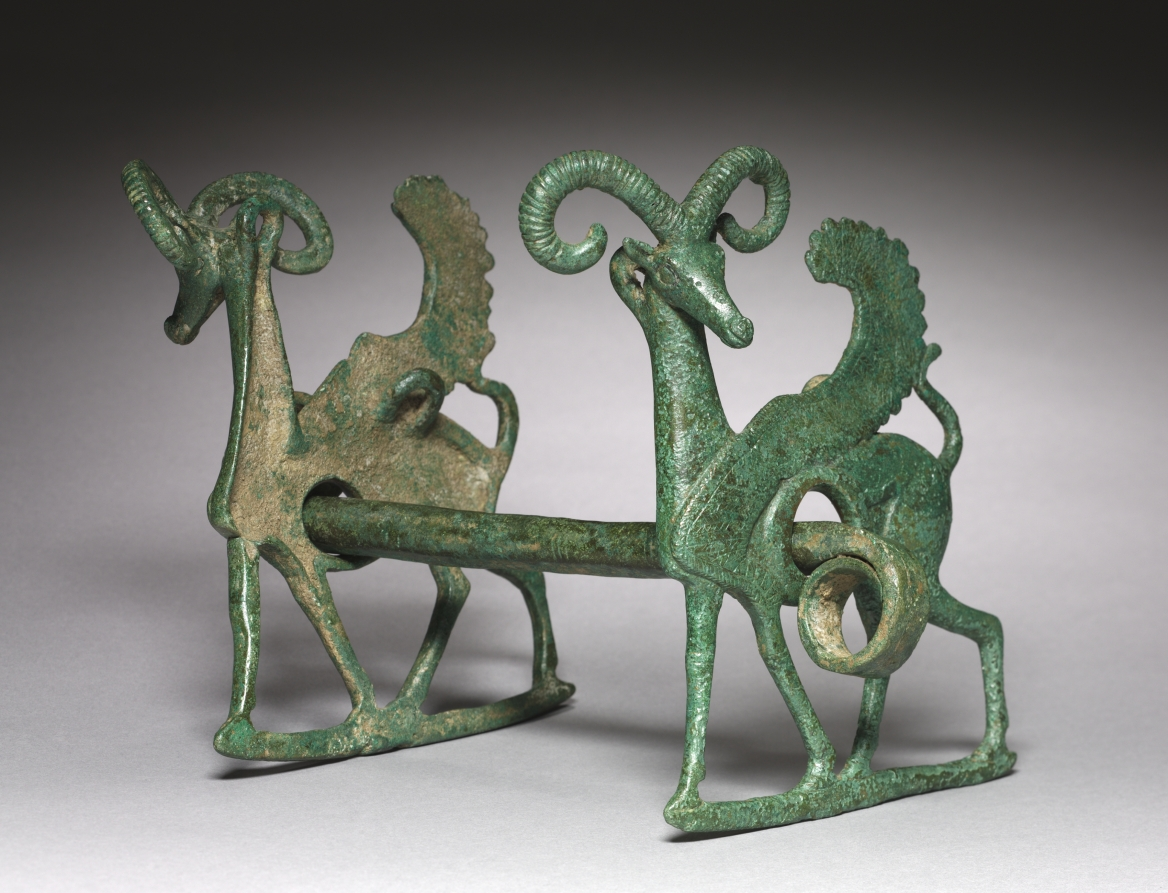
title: Horse Bit with Winged Ibex Cheekpieces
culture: Iran, Luristan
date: 800–600 BCE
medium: bronze, cast and incised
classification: Sculpture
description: This cast bronze horse bit joins two cheekpieces in the form of winged ibexes striding forward with turned heads. Incised lines decorate their curved horns and feathered wings. Rings penetrating their bodies hold the metal bit, while smaller rings on the hollow, unworked inner sides (behind the heads and hindquarters) may have held straps to secure the bit over the horse’s face. This work is said to be from Luristan, a region in western Iran known for its creation of bronze weapons, horse trappings, and standards in the Iron Age.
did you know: Fantastical creatures such as winged ibexes and sphinxes often appear in Luristan bronzes.